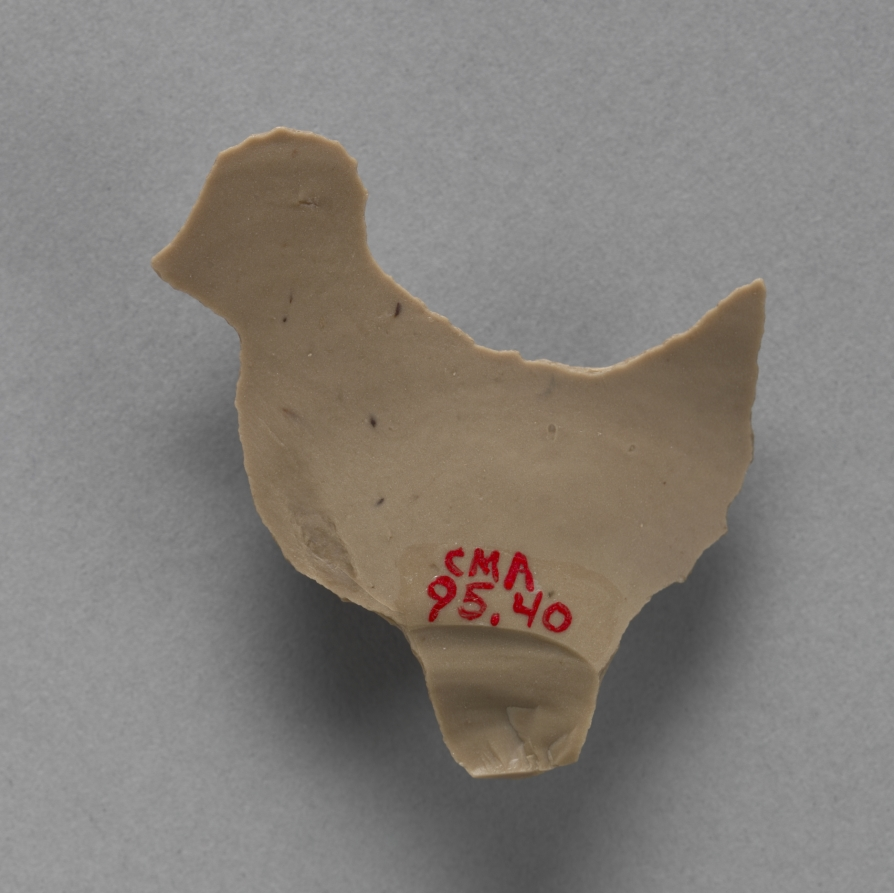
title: Flint in the Form of a Bird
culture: Egypt, Predynastic (5000–2950 BCE), Naqada II–III (3650–3000 BCE)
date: 4000–3000 BCE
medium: tan-colored flint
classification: Implements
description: This flint is ground on one side and ripple-flaked on the other, indicating the date. Nonrepresentational flints were tools and weapons. Representational ones like this, however, were undoubtedly tomb gifts and never used. The type of bird represented is a Guinea fowl or quail. A number of Egyptian flints in this form are known although this one is one of the largest and is of exceptional quality.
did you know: The exact function of objects like this is unknown; it may have been an amulet or charm.